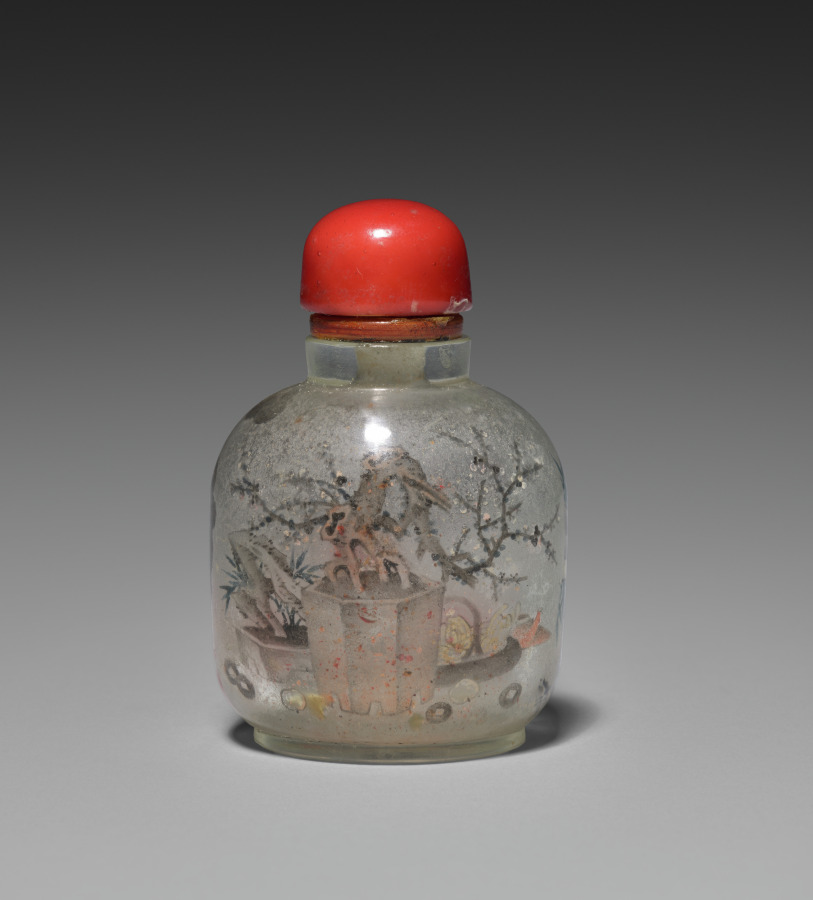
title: Snuff Bottle with Stopper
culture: China, Qing dynasty (1644–1911), Qianlong reign (1736–95)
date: 1736–95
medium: crystal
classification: Stone